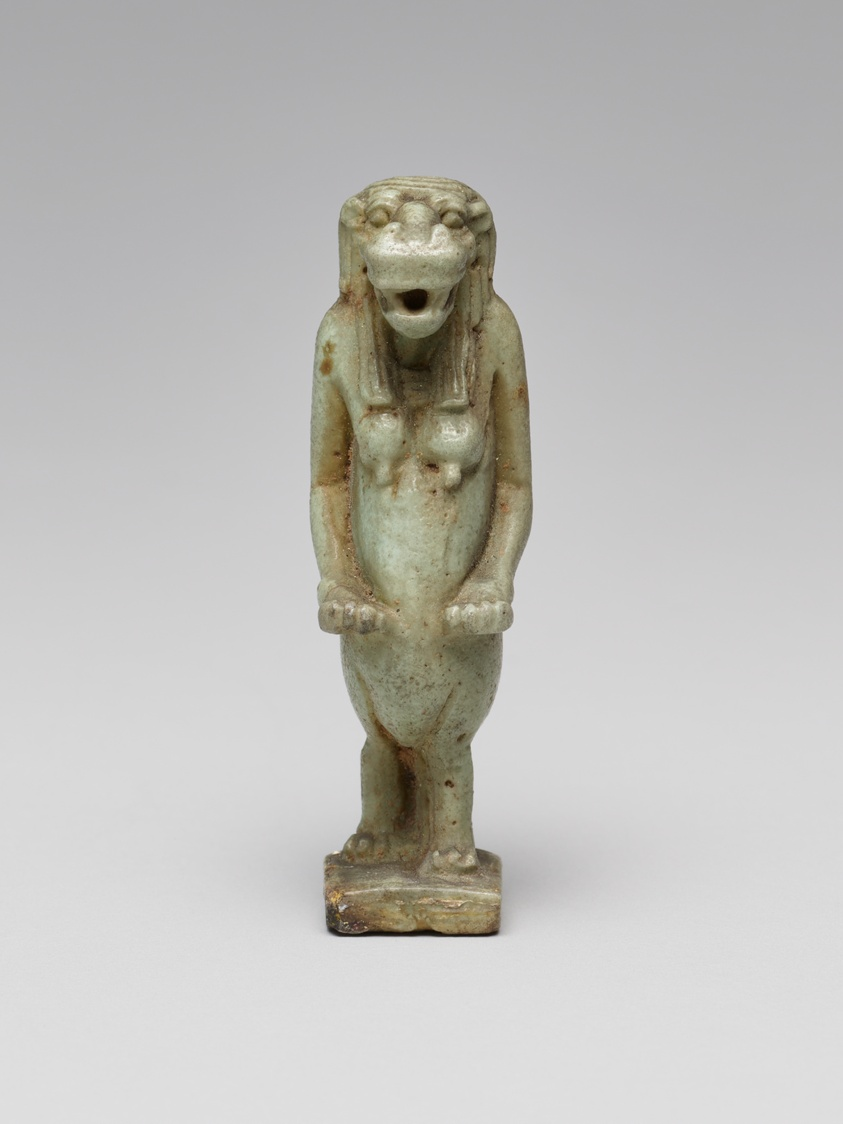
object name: Costume and Accessories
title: Amulet of Taweret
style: third intermediate period, egyptian, ancient, late period (egyptian)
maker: Egyptian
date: Third Intermediate Period–Late Period (about 1069–332 BCE)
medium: Faience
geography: Egypt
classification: amulet; ceramics; jewelry; ancient art; costume; faïence (composite material)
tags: goddesses